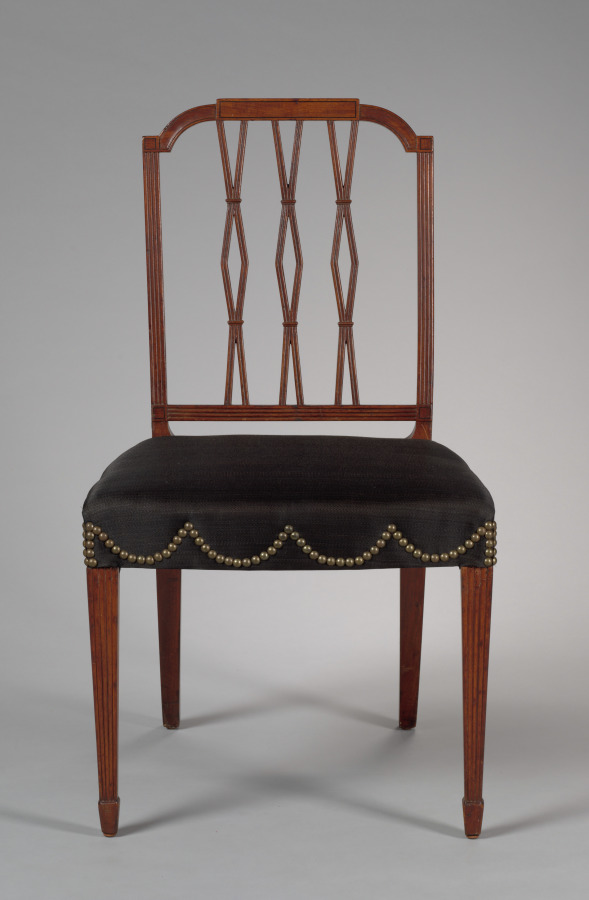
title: Side Chair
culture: America, Massachusetts, Boston, late 18th Century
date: c. 1790–1800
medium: mahogany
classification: Furniture and woodwork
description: Chairs of this or similar design seem to have been made by several Boston cabinetmakers. This chair may have belonged to one or more members of the distinguished Derby family or West family-or both-of nearby Salem, Massachusetts.